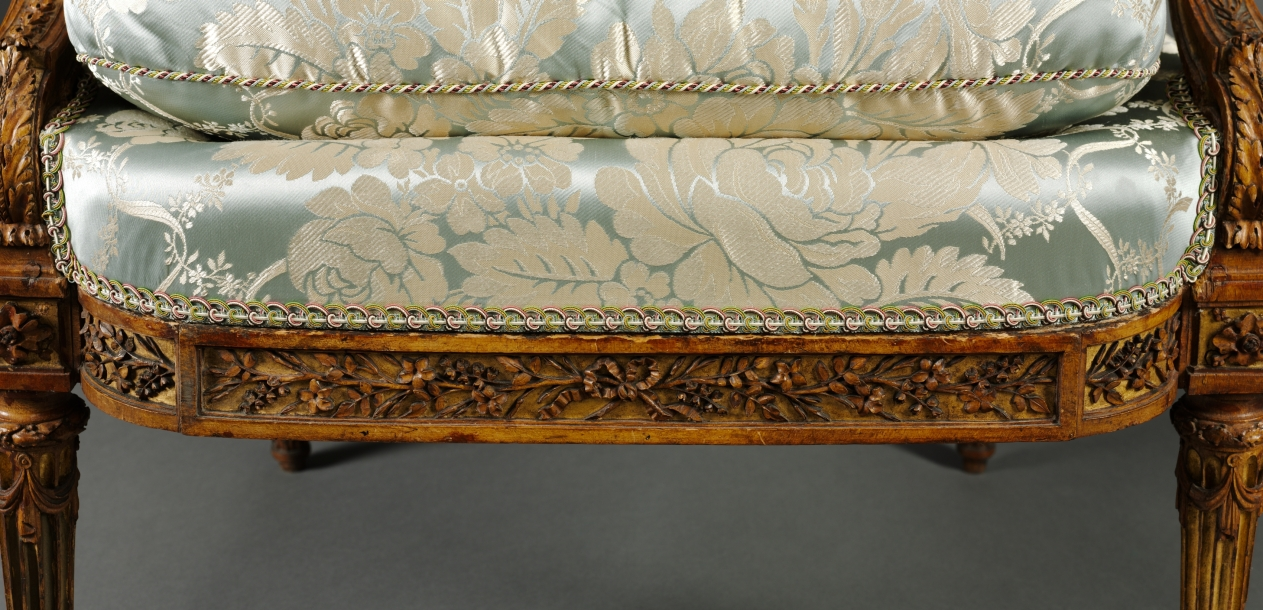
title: Armchair (Fauteuil) (2 of 2)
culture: France, 18th century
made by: Nicolas-Denis Delaisement (French)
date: c. 1785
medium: boxwood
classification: Furniture and woodwork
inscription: signed on front and back of frame of seat underneath: Delaisement with inverted "s."